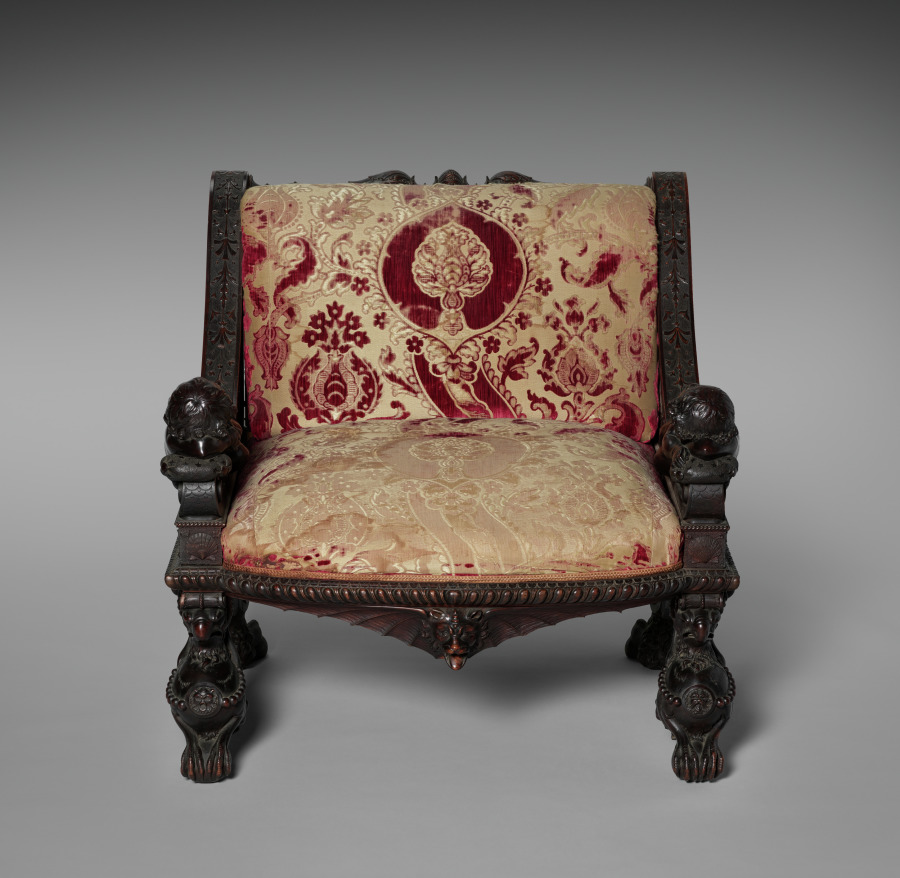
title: Armchair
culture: Italy, Florence, 19th century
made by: Luigi Frullini (Italian, 1839–1897)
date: 1876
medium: walnut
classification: Furniture and woodwork